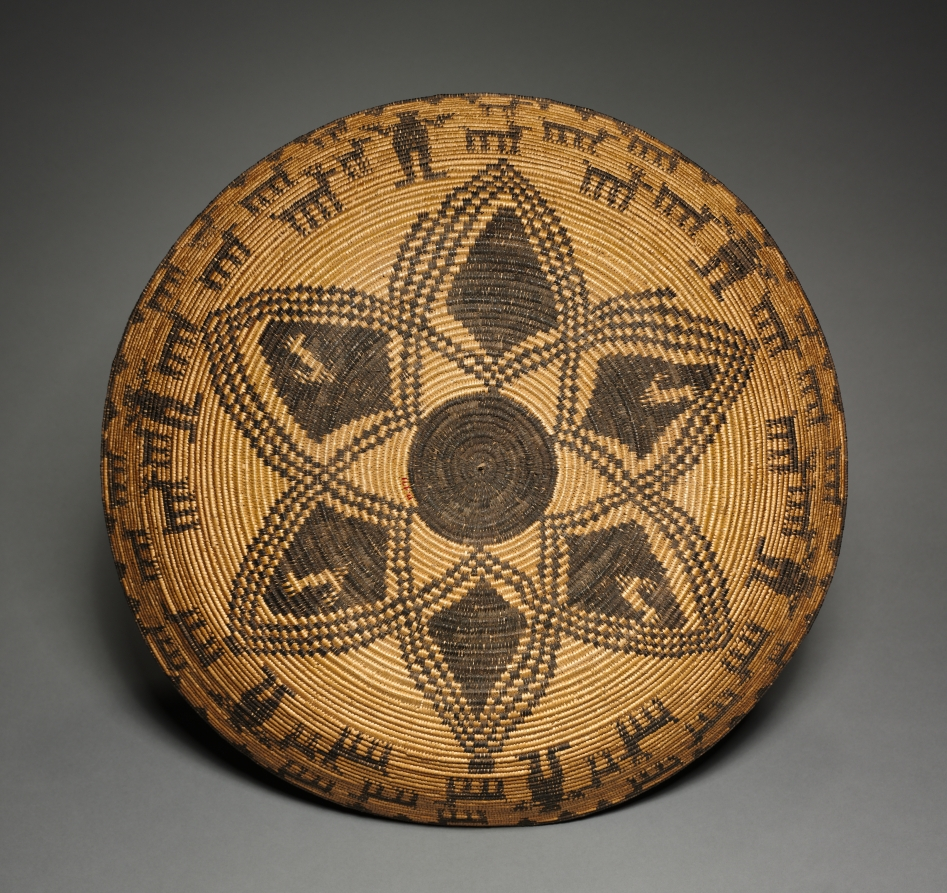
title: Tray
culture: Southwest, Apache, Western, early 20th century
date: early 1900s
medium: basketry, coiled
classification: Basketry